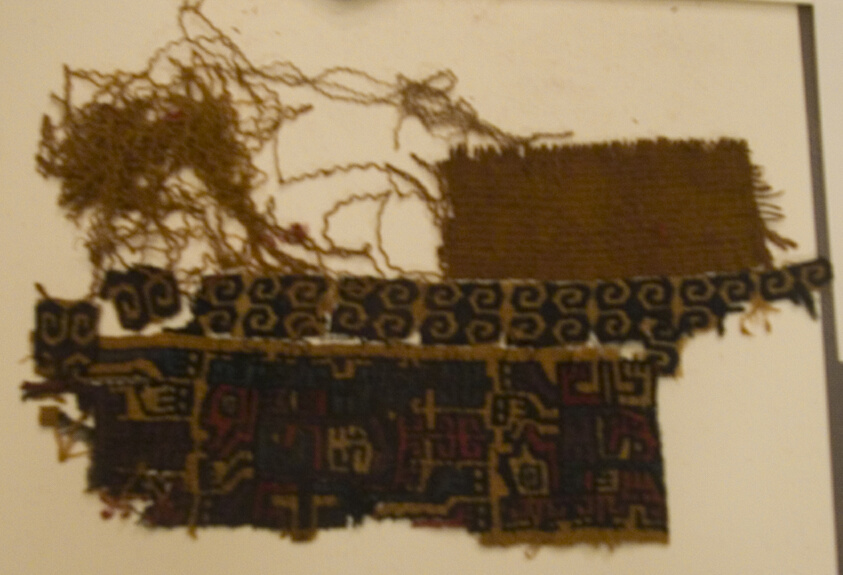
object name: Textile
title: Fragment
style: nazca, andean, andes, Pre-Columbian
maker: Nazca-Wari; Peru, Probably south coast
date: A.D. 700/900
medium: Slit tapestry and plain cloth. Applied paint gold colored border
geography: Peru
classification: textile; weaving